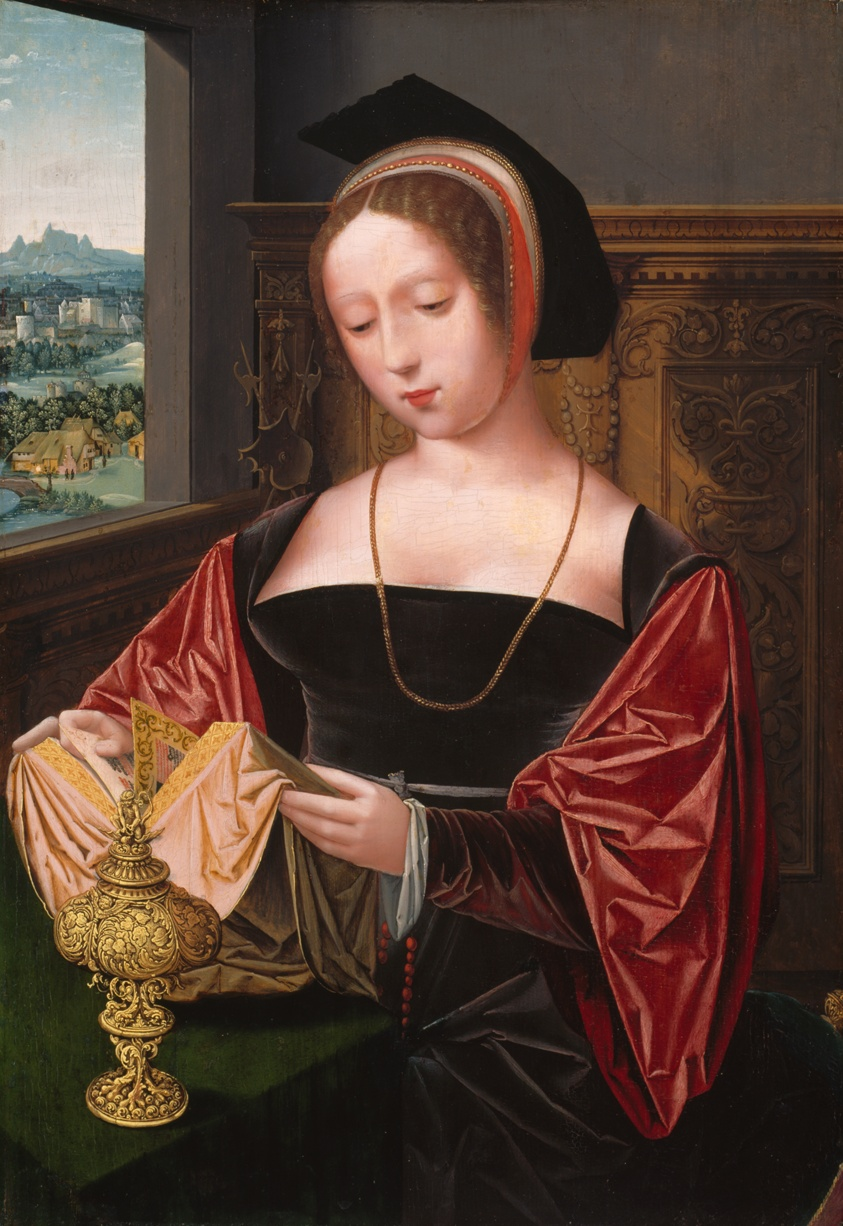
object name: Painting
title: A Lady Reading (Saint Mary Magdalene)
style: sixteenth century, 16th Century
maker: Master of the Female Half-Lengths (Netherlandish, active about 1520–1540)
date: c. 1530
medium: Oil on panel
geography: Netherlands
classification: oil on panel; paint; oil paintings (visual works); painting; european painting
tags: Mary Magdalene, woman, towns, shields, religious, religion, red (color), reading, panel, landscape, jewelry, interior, headdresses, gold (color), Devotion, coat of arms, Christianity, Christian subjects, building, book, black (color), bibles